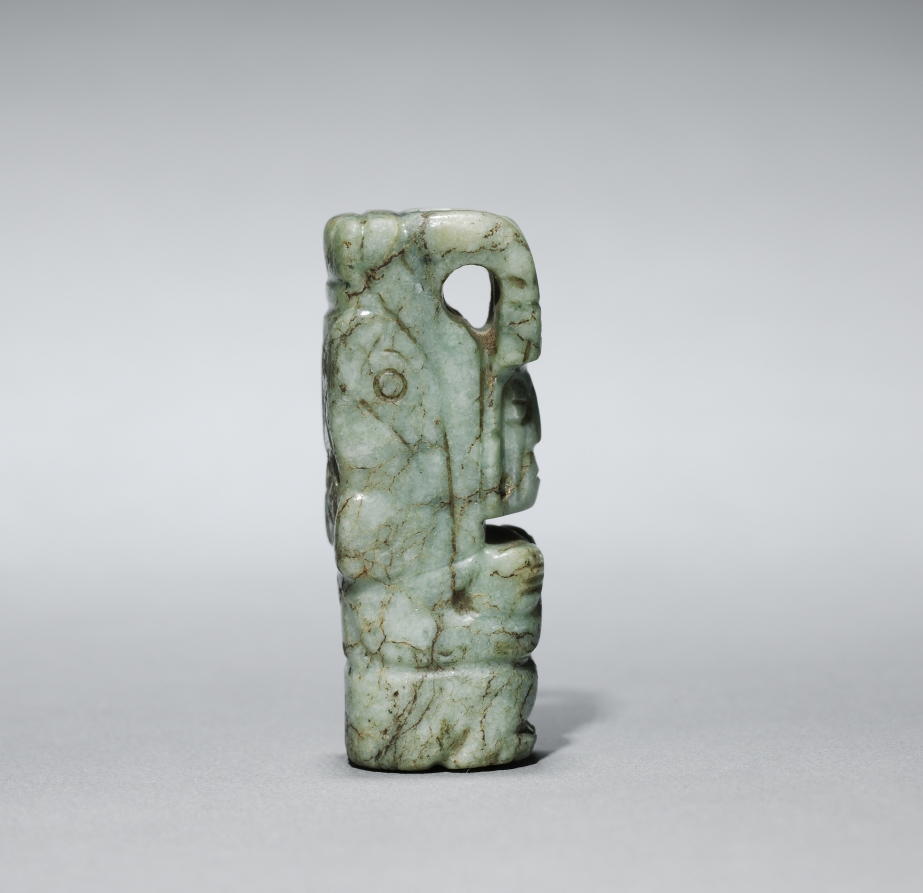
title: Figurine Pendant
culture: Mexico, Oaxaca, Mixtec style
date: c. 1200–1519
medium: jade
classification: Jade